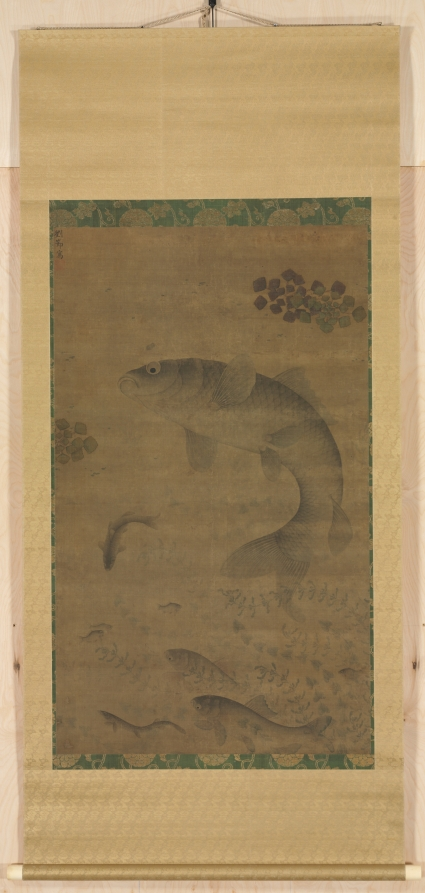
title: Leaping Carp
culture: China, Ming dynasty (1368–1644)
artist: Liu Jie (Chinese, c. 1447–1520s)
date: 1368–1644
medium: hanging scroll, ink and color on silk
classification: Painting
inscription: Artist's signature and seal: Written by Liu Jie 劉節寫. [seal] Chin-i-chih-hui chih chang.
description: With a fine ink line and graded wash, the life-like depiction of these swiftly moving carp is representative of the high quality of works by Liu Jie, a Ming dynasty court painter known for his fish paintings. The artist’s signature and seal are in the painting’s top left corner. The carp is an auspicious and popular subject in Chinese painting. Here, the leaping carp can be associated with “a carp jumping the dragon gate,” which according to mythology transforms into a dragon, emblematic of a scholar’s success in passing the civil service examinations. Another reading suggests that this carp is not leaping but guiding his offspring in worshipping heaven.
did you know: The clusters of geometric leaves painted with mineral pigments are likely water caltrap.